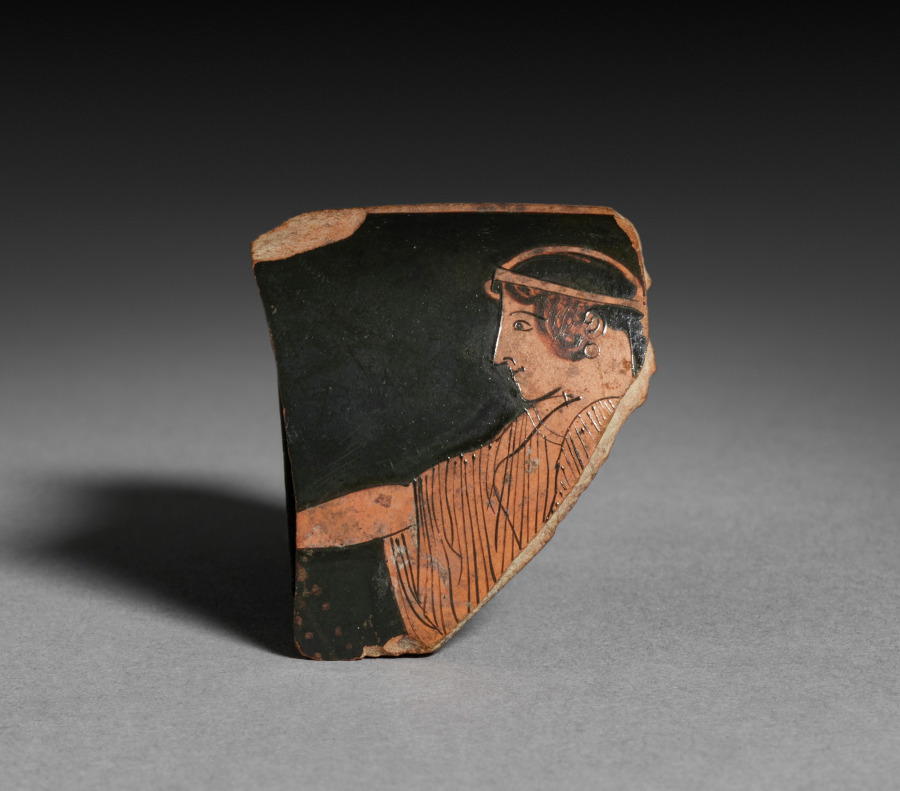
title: Fragment from Red-Figure Cup: Woman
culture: Greek, Attic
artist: near the Telephos Painter (Greek, Attic, active 480–460 BC)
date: c. 470–460 BCE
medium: ceramic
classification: Ceramic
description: A bit of preserved lip shows that this fragment comes from a kylix, or drinking cup. A finely dressed woman, with earring and headband, reaches out with her right hand, now lost but once holding a wreath in added red paint. Relief lines standing above the surface outline the face, neck, arm, and other details.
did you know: Painted on the back side of this fragment is ORVIETO, its likely findspot more than a century ago.